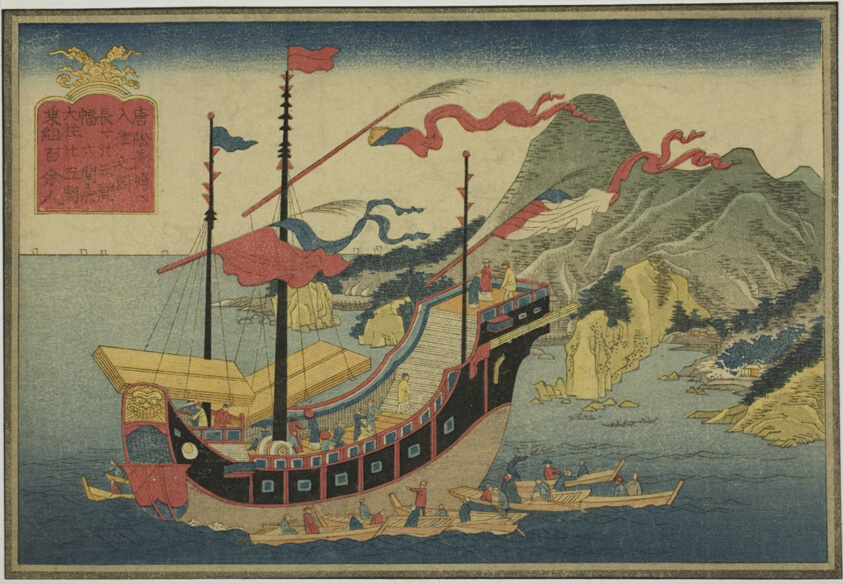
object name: Print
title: Chinese Ship, from the set of eight Pictures of Foreign Ships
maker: Unknown Artist (Japanese, date unknown)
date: 1840s–1850s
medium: Color woodblock print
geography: Japan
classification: woodblock print; print; asian art